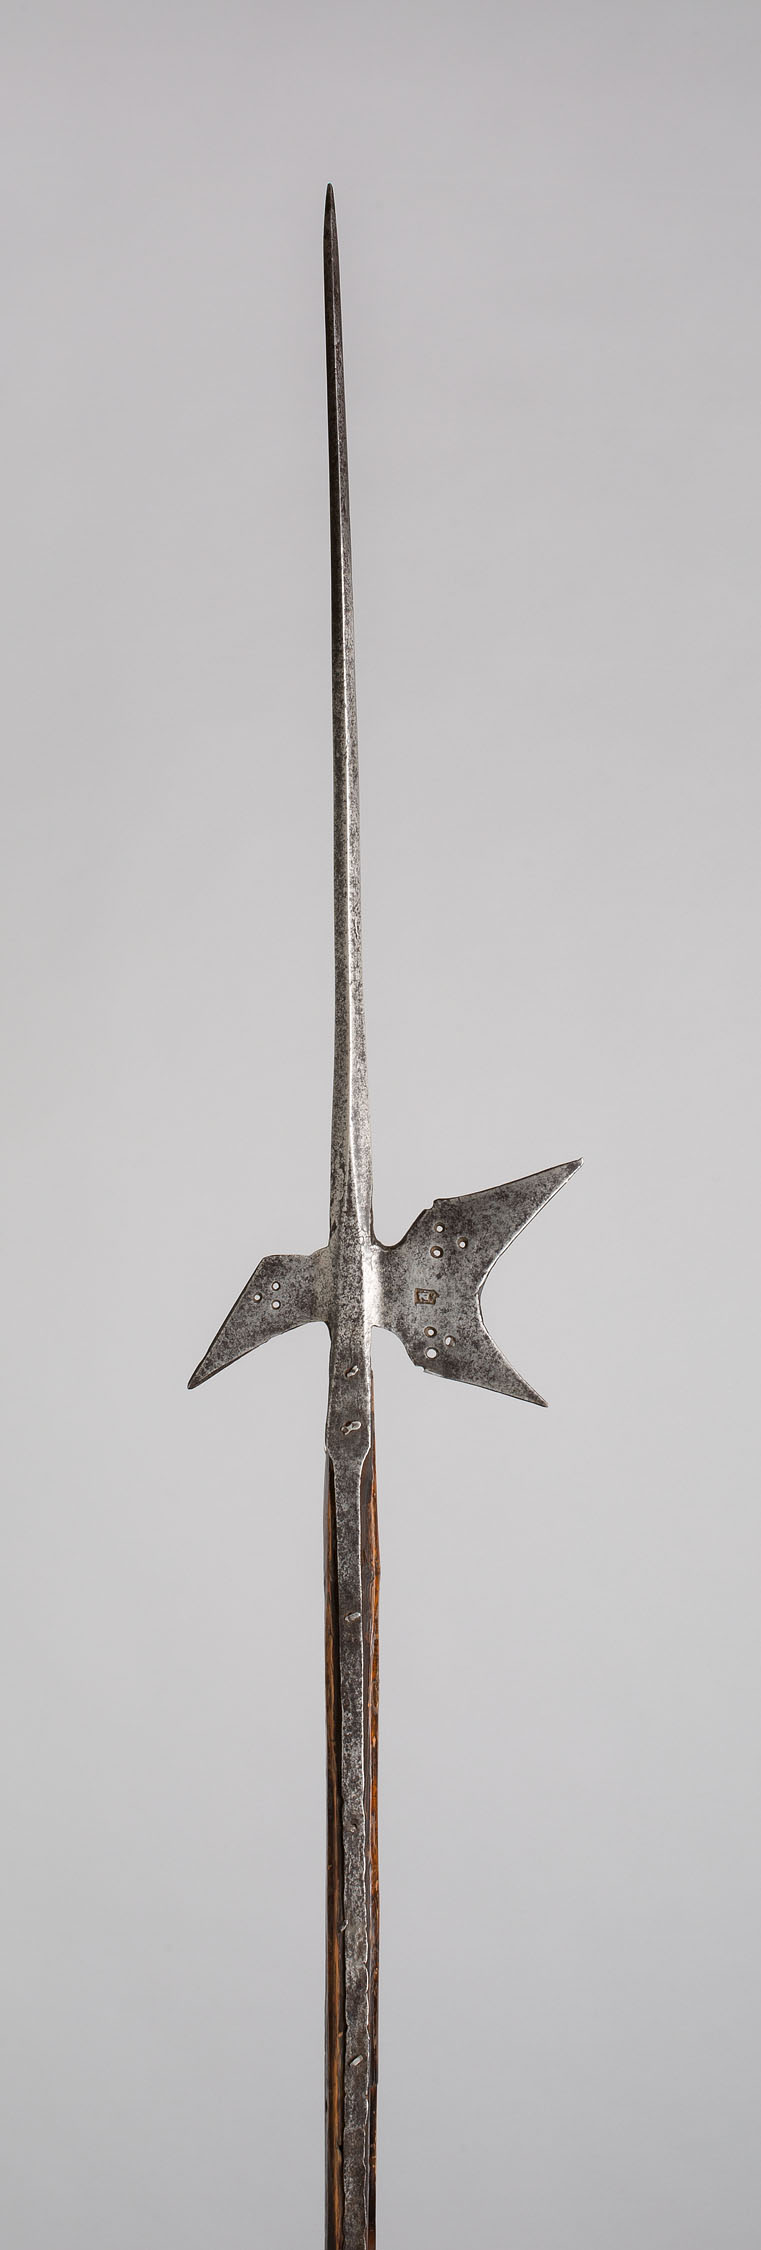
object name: Arms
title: Halberd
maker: German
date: 1575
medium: Steel and wood (old oak and modern pine)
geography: Germany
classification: edged weapon-staff; arms; arms and armor